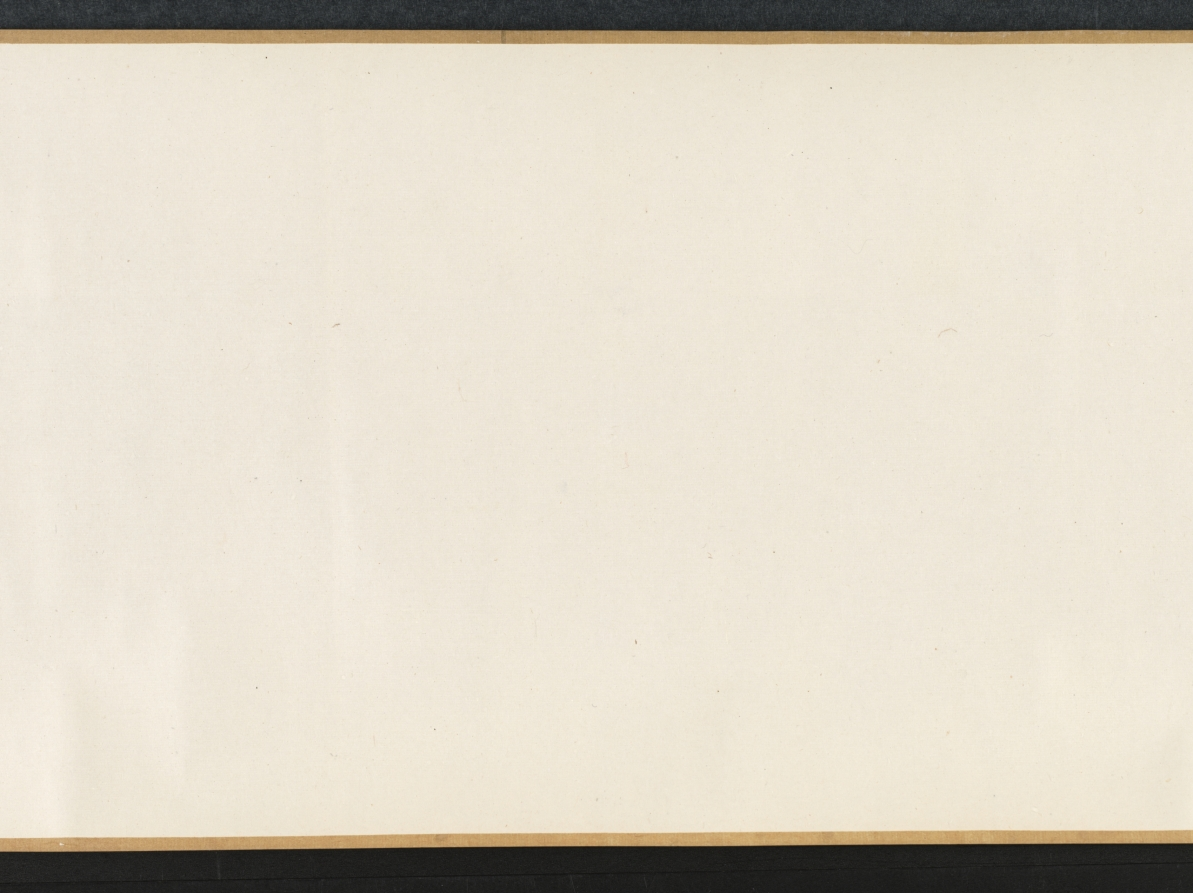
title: The Lantern Night Excursion of Zhong Kui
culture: China, Yuan dynasty (1271-1368)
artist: Yan Hui (Chinese, active 1270–1310)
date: late 1200s–early 1300s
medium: handscroll; ink and slight color on silk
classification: Painting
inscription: Artist's signature [and probable seal]: Yan Qiuyue 顏秋月 Title on frontispiece and 1 seal of Niu Shuyu 鈕樹玉 (1760–1827): Qiuyue mohuan 秋月墨幻 [Qiuyue's Ink Fantasy]. 31 additional seals: 2 of Yang Shiqi 楊士奇 (1365–1444); 2 of An Guo 安國 (1481–1534); 8 of Xiang Yuanbian 項元汴 (1525–1590); 2 of Geng Zhaozhong 耿昭忠 (1640–1686); 4 of Pu Tung 溥侗 (1870–1952); 7 of Tan Jing 譚敬 (1911–1991); 1 of Liu Ting-chih (20th c.); 5 unidentified.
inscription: An inscription by Zizhi Shanren 紫芝山人 [probably Jiang Hui 蔣惠], dated 1389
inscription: An inscription by Wu Kuan 吳寬 (1436–1504)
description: Here, the demon queller Zhong Kui leads a nightly procession of street entertainers with bare, muscular bodies and demonic faces. Some wear shabby clothes, and all perform stunts and tricks to astound and scare the viewer. In fact, a New Year custom in cities of southeast China had the poor, disguised as demons, process through the streets and play their tricks to clear households of evil spirits and welcome the spring. From right to left, a demonic figure leads the procession and beats a drum; another lifts a large rock; one stands on his hands trying to drink; one balances a jar on his elbow; three hold and wield weapons; one carries a folded chair covered by a cow’s skin; another holds Zhong Kui’s qin (zither), books, brush, and inkstone. At the end of the scroll, two figures offer a cup and bottle of wine to Zhong Kui, who lifts his hand in command.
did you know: Zhong Kui was an ancient ghostbuster.